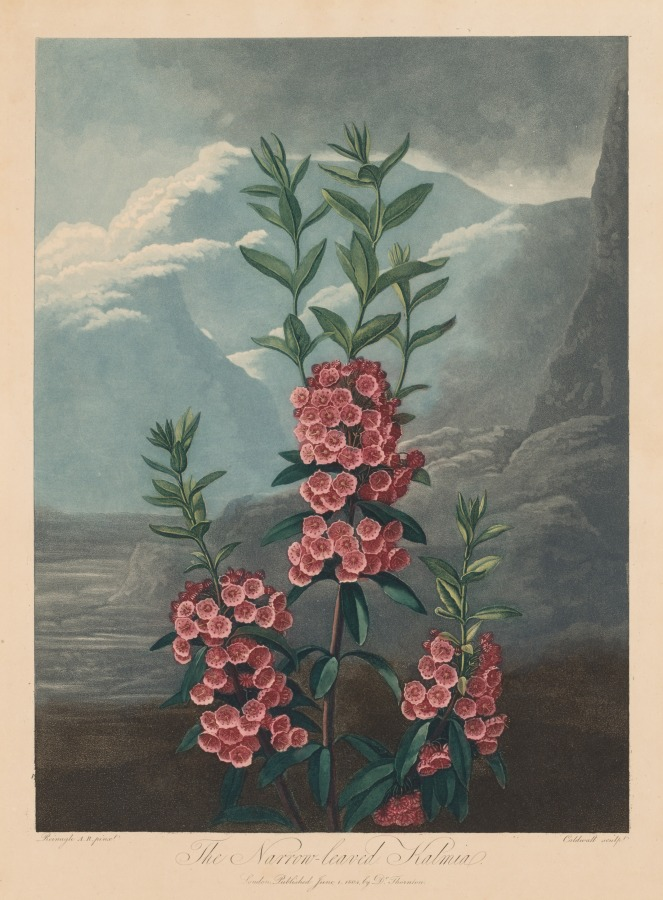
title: The Temple of Flora, or Garden of Nature: The Narrow-leaved Kalmia, Mountain Laurel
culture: England, late 18th-early 19th Century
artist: Robert John Thornton (British, 1768–1837)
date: 1804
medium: aquatint, stipple and line engraving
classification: Print